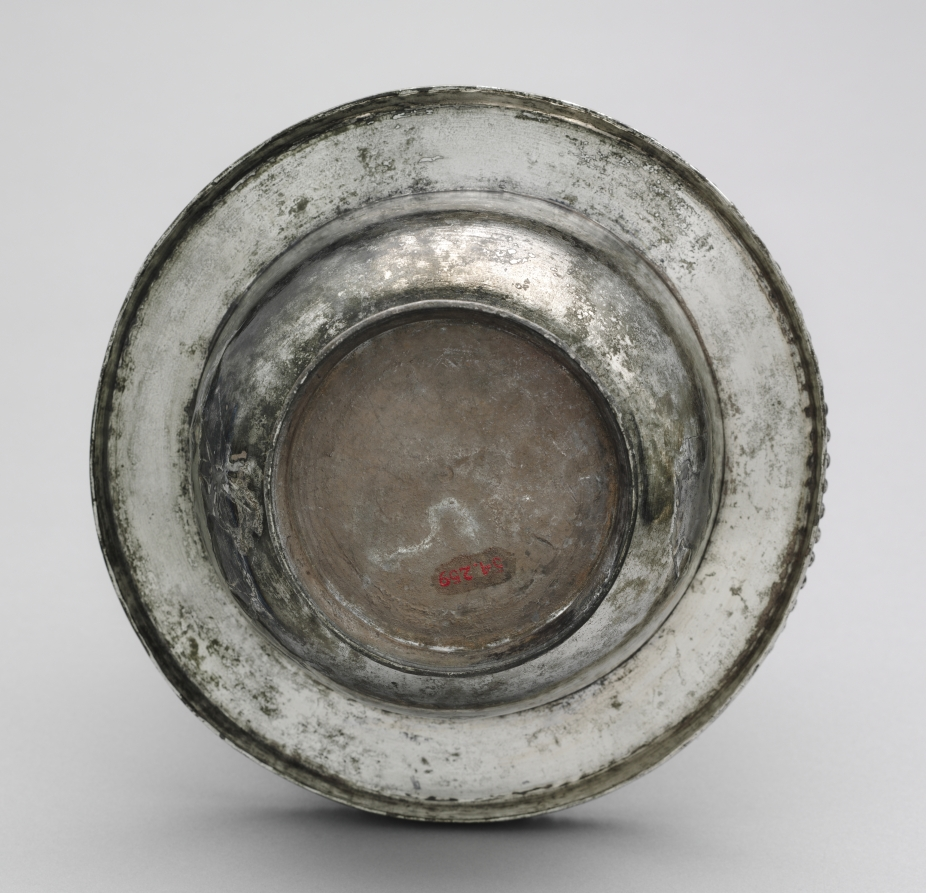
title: Bowl with Beaded Rim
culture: Byzantium, Syria(?), Byzantine period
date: 300–500 CE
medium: silver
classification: Metalwork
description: This bowl was probably intended for use in a private home, perhaps a fashionable villa on the Mediterranean coast. Wealthy Romans stored a variety of silver vessels and implements for entertaining and enjoyed using them while eating and drinking at social events. This bowl is decorated with a beaded rim, a feature often found on domestic silver bowls of this period. The basic shape was formed first by hammering. Then the bowl was polished and chased while it turned on a lathe. The beaded decoration was achieved by hammering the silver into a mold.